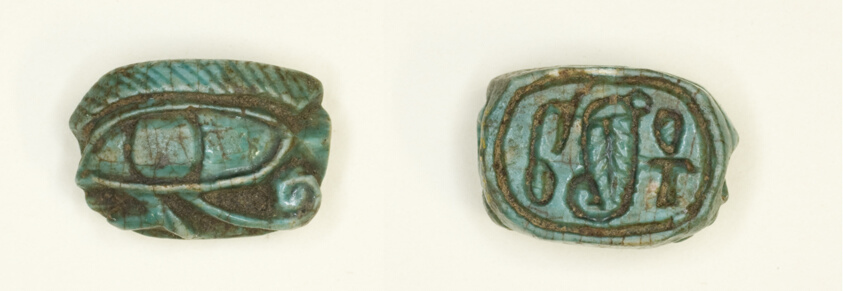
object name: Costume and Accessories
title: Scaraboid: Wedjat Eye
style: new kingdom, egyptian, ancient, eighteenth dynasty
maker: Egyptian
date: New Kingdom, Dynasty 18 (about 1550–1295 BCE)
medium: Glazed steatite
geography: Egypt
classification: scaraboids; ancient art; costume; amulet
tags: eye of Horus, cobras, Hieroglyphs